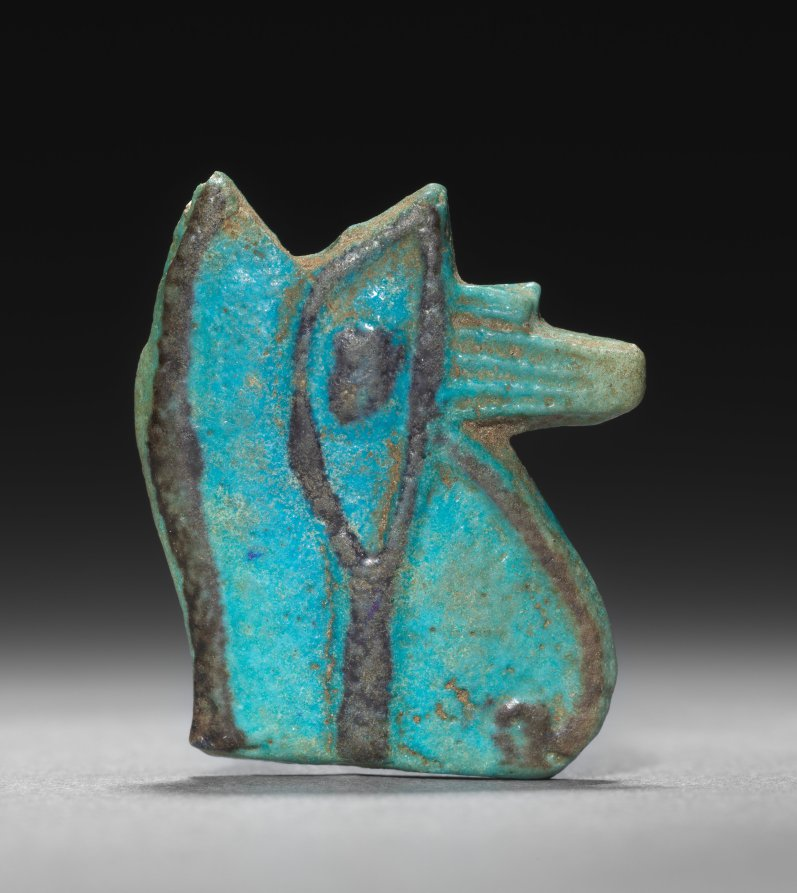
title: Eye of Horus Amulet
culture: Egypt, Third Intermediate (1069–715 BCE), Dynasties 22–25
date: 945–715 BCE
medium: turquoise faience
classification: Amulets